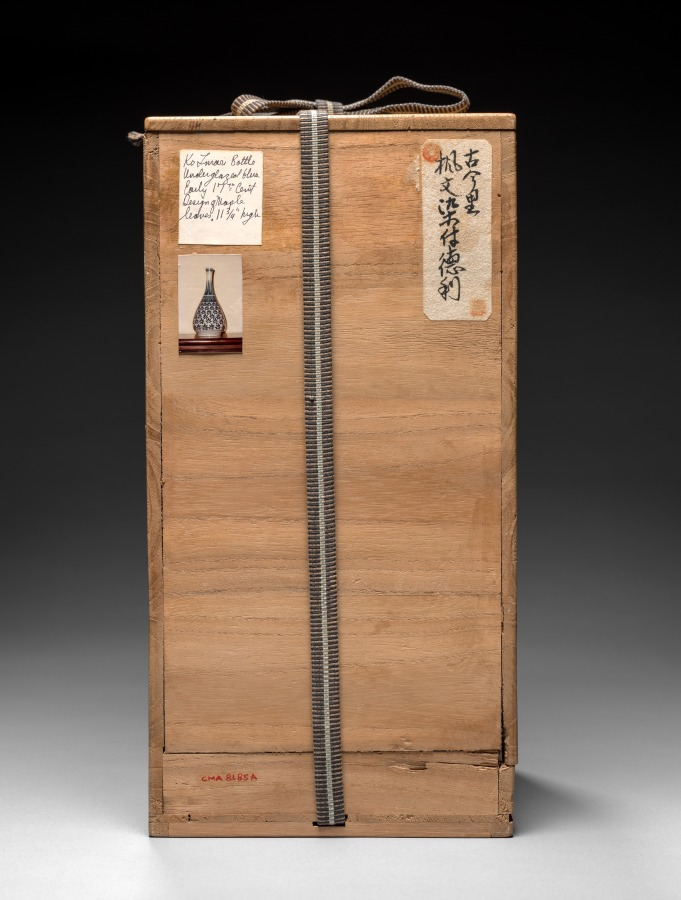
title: Bottle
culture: Japan, Edo period (1615–1868)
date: early 1600s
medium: porcelain painted in underglaze blue (Hizen ware, Arita type, Imari style)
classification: Ceramic